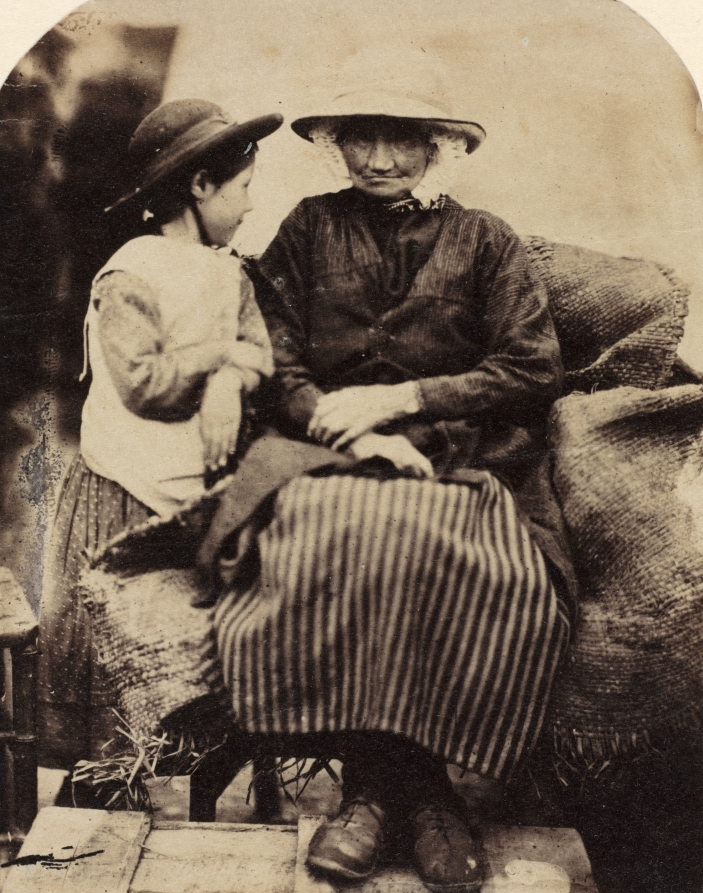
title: Servants at Rhagatt, Corwen, North Wales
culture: England, 19th century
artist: John Lloyd (British, 1865)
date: c. 1860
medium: albumen print from wet collodion negative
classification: Photograph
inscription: Written in pencil on verso: "John Lloyd, d. 1865 / Rhagatt, N. Corwen, N. Wales"